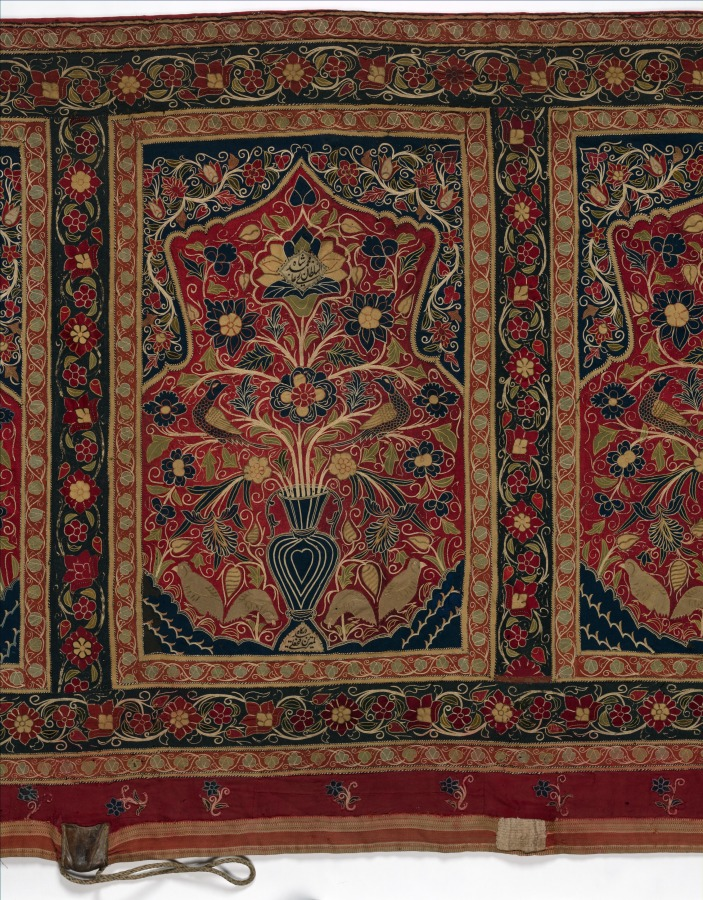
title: Royal Round Tent made for Muhammad Shah (wall panel with three design units)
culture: Iran, Rasht, Qajar period (1779-1925)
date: 1834–48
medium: Interior: wool: plain weave, inlaid work; silk: embroidery, chain stitch; tape, leather; Exterior: cotton, wool: plain weave; rope, iron ring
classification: Textile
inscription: Inscriptions: The central design unit of this wall panel has two embroidered inscriptions. 1. Upper inscription (center of the top blossom): "Muhammad shah sultan-e ghazi."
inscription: 2. Lower inscription (on the base of the vase): "Kamtarin bandeh-ye dargah fath'ali."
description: Royal tents were potent symbols of authority, wealth, and power throughout the greater Middle East. Rulers owned thousands of tents. They were used for shelter, shade, and innumerable functions in tent compounds that were essential for imperial ceremonies, travel, and military campaigns. Distinguished by size with elaborately decorated interior walls and ceilings, tents could be as large as castles. Opulent tents were also presented as imperial gifts. Tents are only known through documents before 1600. For example, in Baghdad in 809, Caliph Harun al-Rashid owned 4,000 ceremonial tents and 150,000 camping tents that were stored in the imperial Abbasid treasury. An astonishing variety and quantity of tents were housed in the royal Fatimid tent storeroom in Cairo in 1068-69, including "military tents, fortress tents, and castle tents, manufactured of . . . gold-brocaded stuff embroidered with designs of elephants, wild beasts, horses, peacocks, birds." Since 1600, Ottoman Turkish tents with elaborate floral decoration have been preserved in Istanbul in the Topkapi Palace Museum and Military Museum, and in European collections as war booty, primarily from the Ottoman Turks' attempt to conquer Vienna in 1683. These tents are not done in the Rasht technique, but rather are applique. In contrast, royal tents from Iran are extremely rare. This spectacular ceremonial tent is embroidered with the name of its owner, Muhammad Shah, who ruled Iran from 1834 to 1848 during the Qajar dynasty. The radiant jewellike interior features exuberant flora, blossoming vines, and robust birds made with colored wool embellished with silk-thread embroidery.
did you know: Rasht work is named after the city on the Caspian Sea in present-day Iran, which was a major silk trade center with numerous textile workshops.